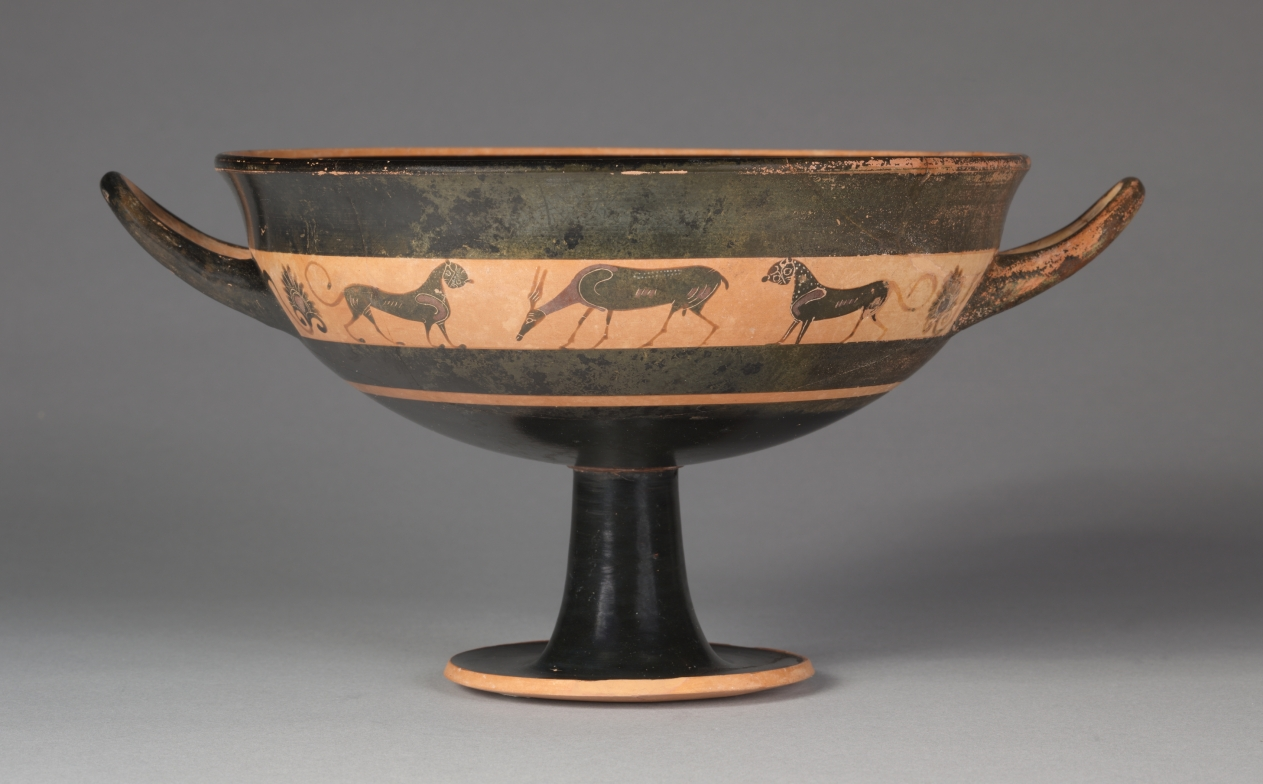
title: Black-Figure Band Cup: Stags and Panthers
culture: Greece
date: c. 540 BCE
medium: ceramic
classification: Ceramic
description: The two sides of this drinking cup are nearly identical, each with a reserved band holding a grazing stag between two panthers. A single palmette appears on either side of each handle, while a reserved circle inside the bowl holds a dot within concentric circles.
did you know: Band cups feature figural decoration only within a reserved band aligned with the handles.